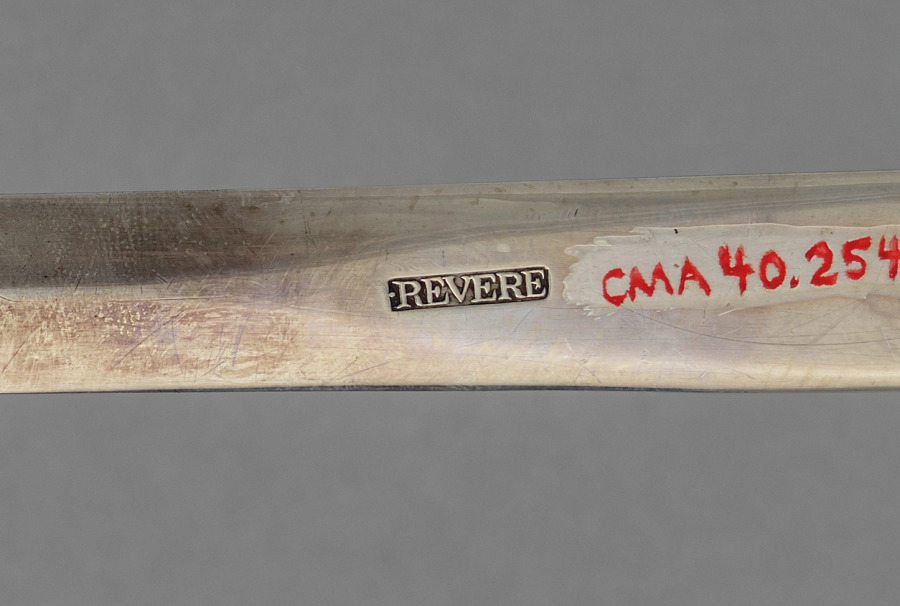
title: Skewer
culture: Europe, late 19th - early 20th century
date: late 1800s - early 1900s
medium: silver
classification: Silver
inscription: engraved "M" in script just below ring at end.